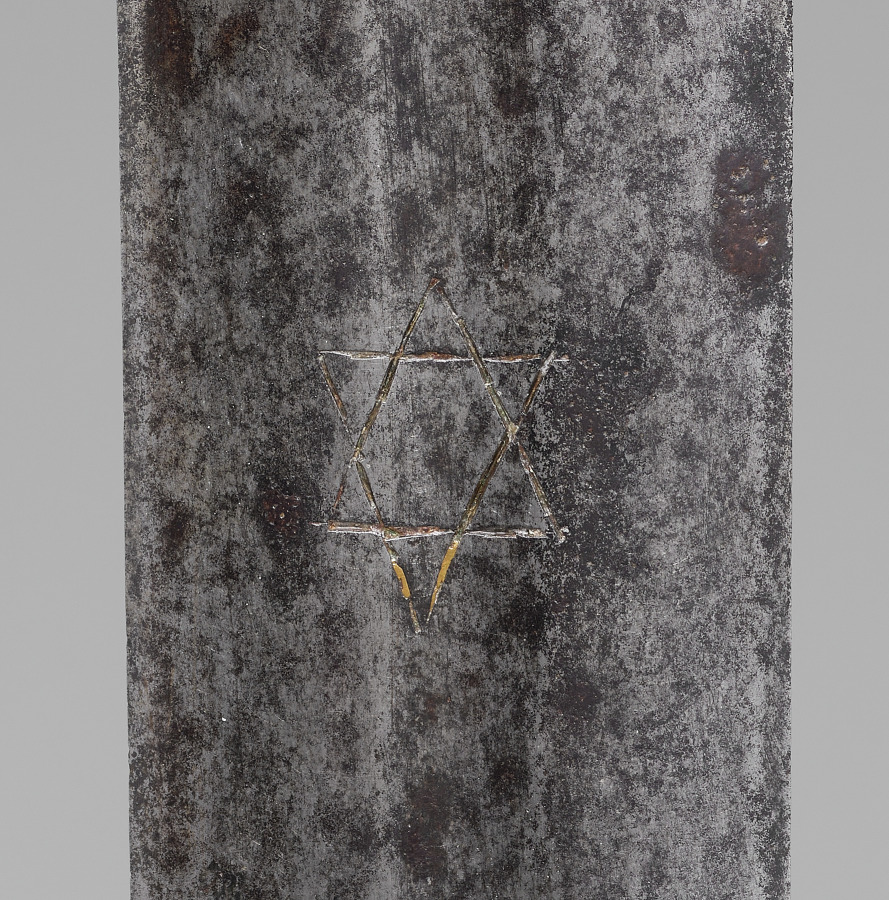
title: Sword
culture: Germany (?)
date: 1400s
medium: steel; wood and leather grip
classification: Arms and Armor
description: During medieval times, everyday objects carried deep spiritual meanings. The knight's sword was perceived as the noblest of weapons because its shape symbolized the cross on which Christ died.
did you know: The unornamented surfaces and signs of use on this sword and those similar to it lead us to believe that they were used in battle. Despite their utilitarian purpose, the blacksmith added details to the handles and hilts to make them visually appealing.